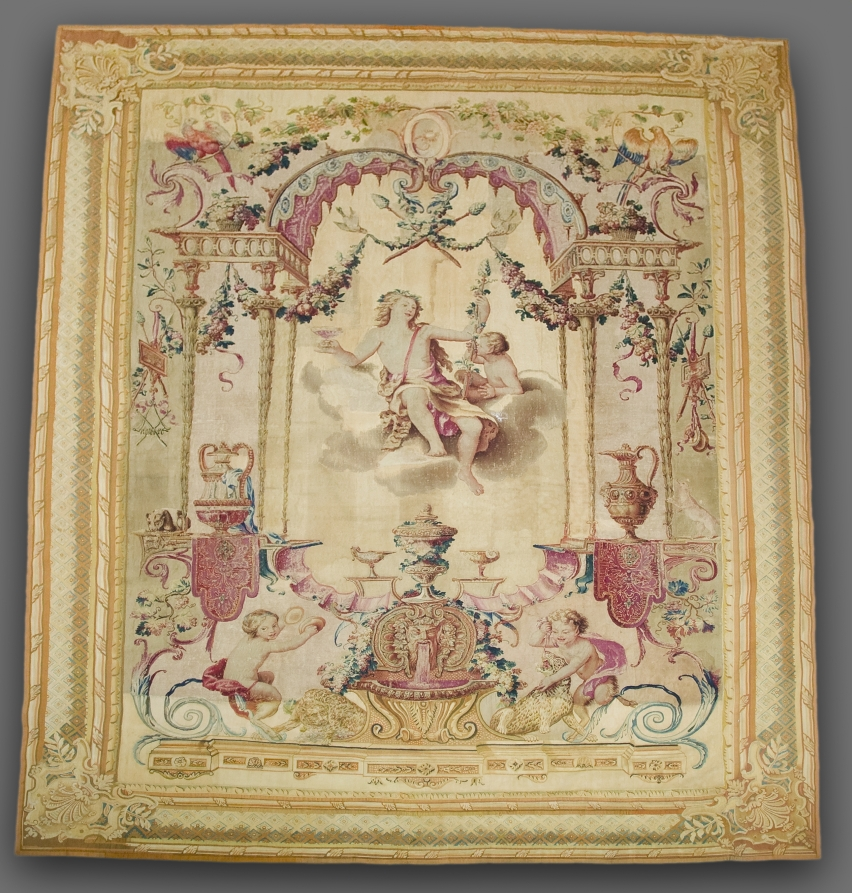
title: Seasons: Autumn, Bacchus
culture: France, 18th century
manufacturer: Gobelins Manufactory (France, Paris, est. 1662)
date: 1700s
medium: tapestry weave; silk, wool, cotton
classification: Tapestry